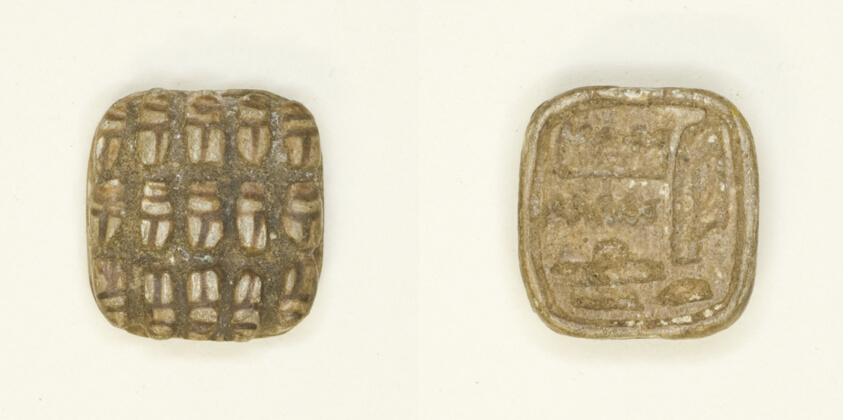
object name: Costume and Accessories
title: Plaque: 15 Scarabs/”Amunhotep”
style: egyptian, eighteenth dynasty, new kingdom, ancient, middle kingdom, twelfth dynasty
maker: Egyptian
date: Middle Kingdom, Dynasty 12 (about 2055–1650 BCE) OR New Kingdom, Dynasties 18–20 (about 1550–1069 BCE)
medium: Steatite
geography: Egypt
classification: scaraboids; amulet; ancient art; costume; plaque (flat object)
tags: scarab beetle, Hieroglyphs